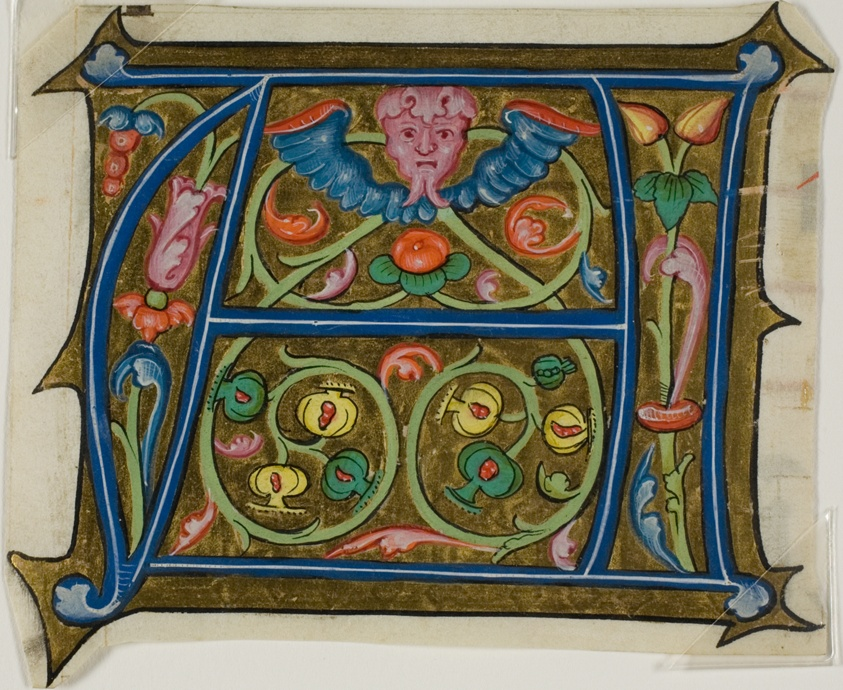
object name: Drawing and Watercolor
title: Decorated Initial "A" with Grotesque and Flora from a Choir Book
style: medieval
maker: French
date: 15th century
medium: Manuscript cutting in tempera and gold leaf on vellum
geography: France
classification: tempera; manuscript; drawings (visual works); prints and drawing